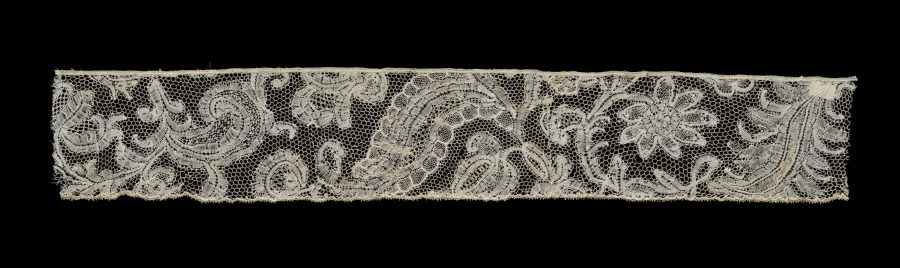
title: Lace Edging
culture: Flanders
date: 1800s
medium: Linen: bobbin lace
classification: Lace